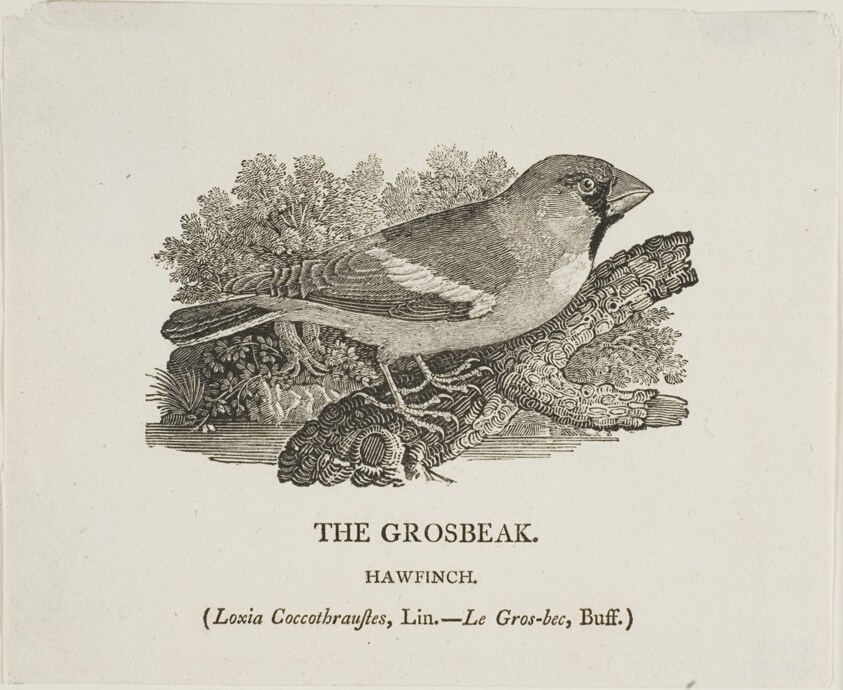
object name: Print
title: Grosbeak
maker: Thomas Bewick (English, 1753-1828)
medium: Woodcut on ivory wove paper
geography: England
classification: relief etching; print; prints and drawing